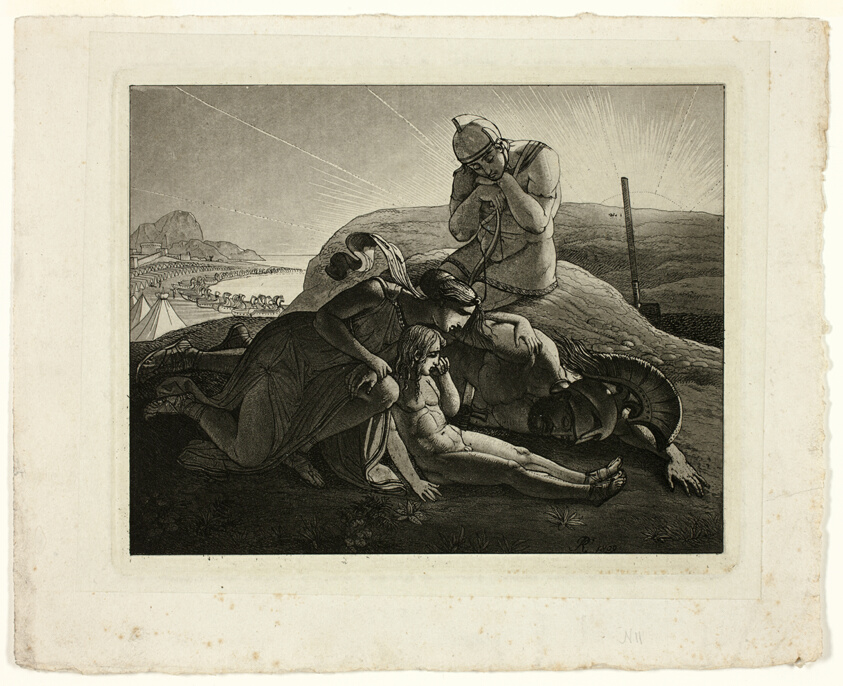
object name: Print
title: Tecmessa, Her Son and Teucer Lamenting the Dead Ajax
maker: Carl Russ (Austrian, 1779-1843)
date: 1809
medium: Etching and aquatint in black on cream wove paper, laid down on ivory wove paper (chine collé)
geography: Austria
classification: etching; print; prints and drawing